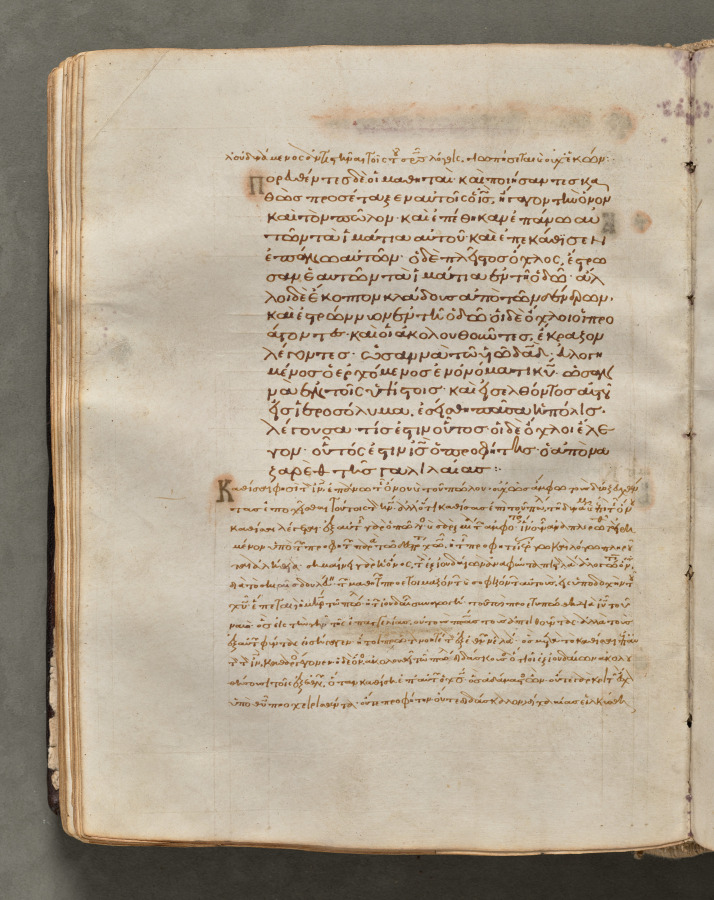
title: Text, folio 91 (verso), from a Gospel Book with Commentaries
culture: Byzantium, Constantinople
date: c. 1000–1100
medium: ink, tempera, and gold on vellum; leather binding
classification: Bound Volume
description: Each of the four gospels in this book opens on a page with brilliantly illuminated borders depicting the author of the text as well as birds-principally peacocks, symbols of the immortality of the soul-and fountains, representing the fountain of life and the salvation of the soul. This volume consists of 428 leaves with texts in Greek. Its level of sophistication suggests that it was probably written and decorated in a monastery in Constantinople.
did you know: Gospel Books were carried in procession through Byzantine churches.